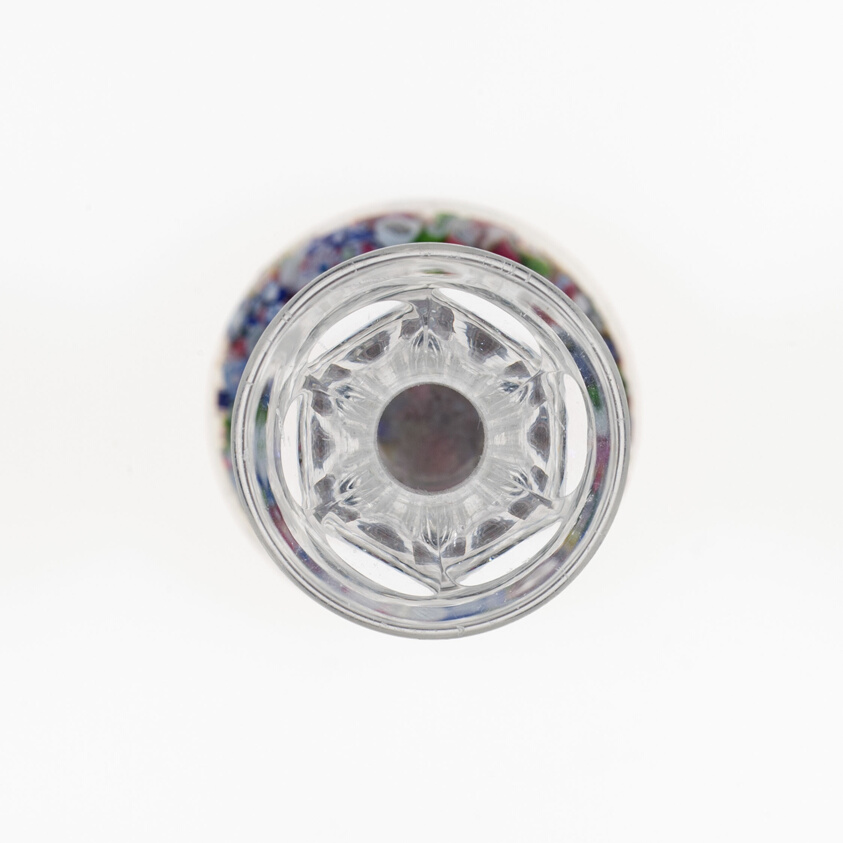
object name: Glass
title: Vase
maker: Saint-Louis Glassworks (Cristalleries de Saint-Louis); Lorraine, France, founded 1586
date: c. 1845–60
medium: Glass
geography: Saint-Louis-lès-Bitche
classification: paperweight; glass